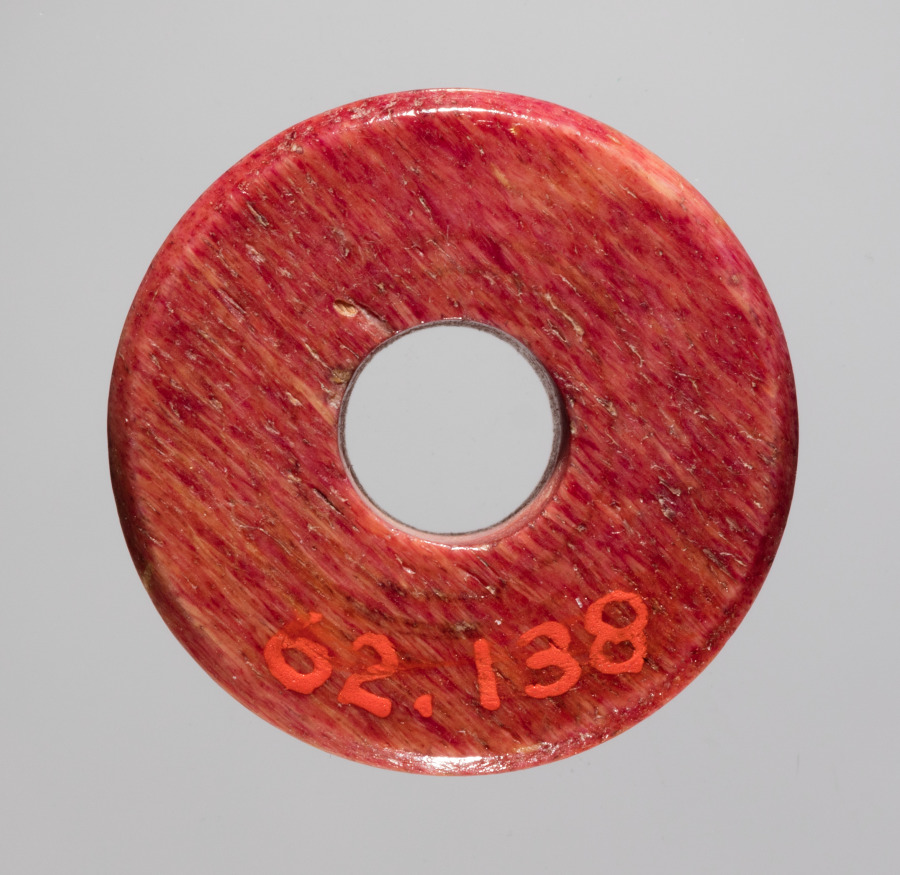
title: Spindle Whorl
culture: Iran, early Islamic period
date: 700s - 900s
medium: bone, incised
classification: Spindle Whorl